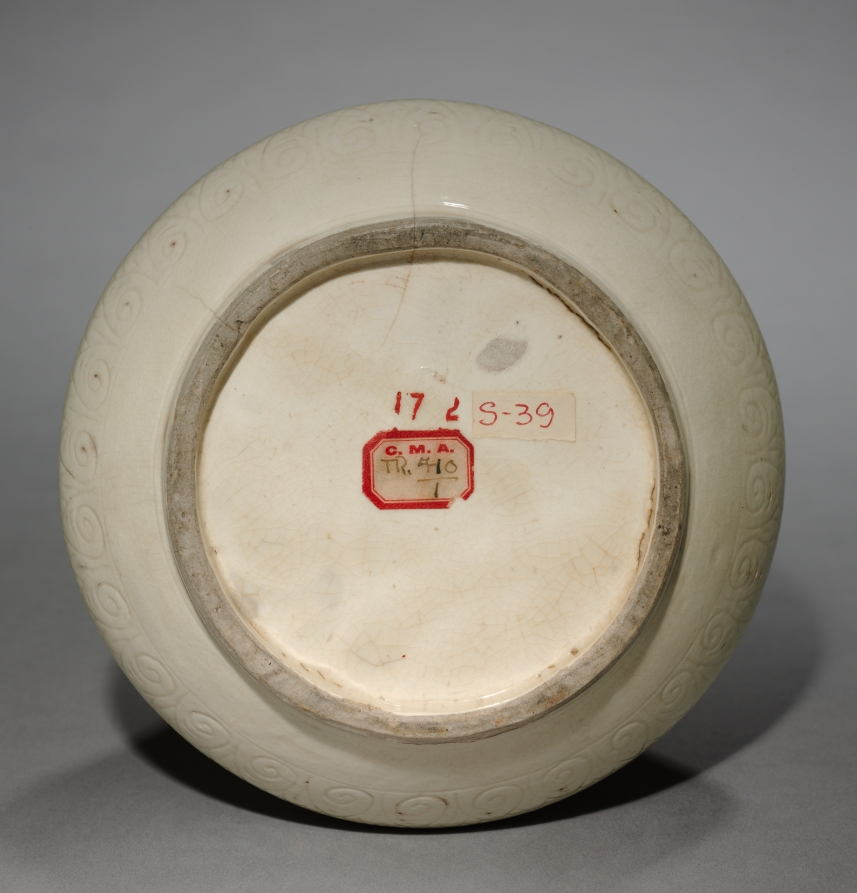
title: Vase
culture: China, Ming dynasty (1368–1644)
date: 1368–1644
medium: porcelain, Ding ware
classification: Ceramic